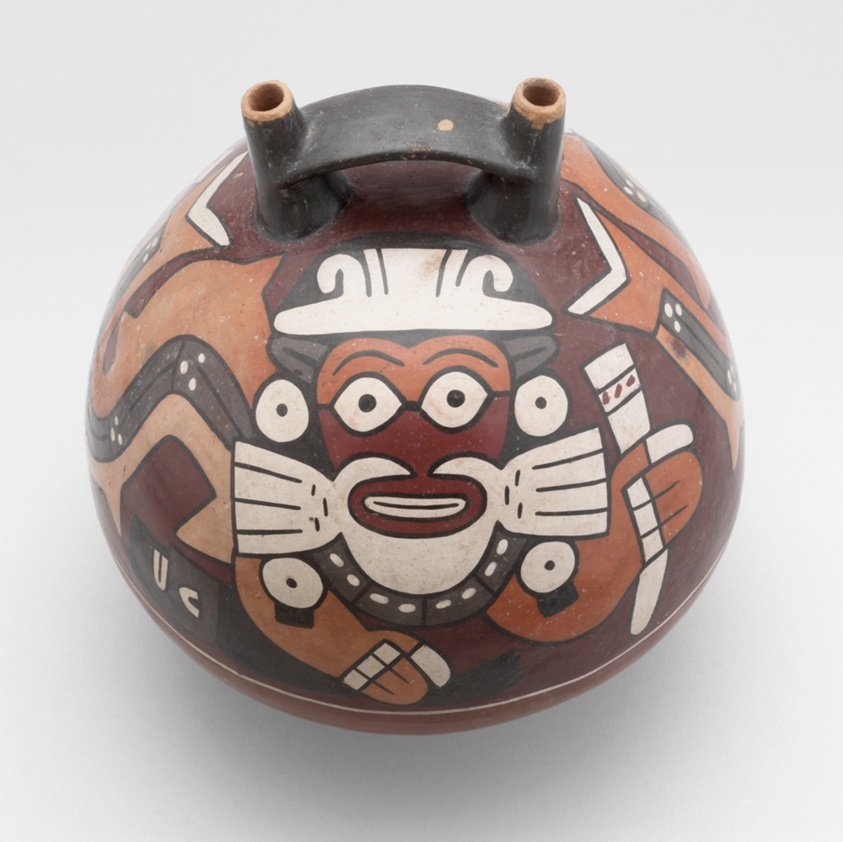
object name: Vessel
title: Vessel with Marine Beings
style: nazca, early intermediate period, Pre-Columbian, americas, andes, Arts of the Americas, andean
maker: Nazca; South coast, Peru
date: 50–500 CE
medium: Ceramic and pigment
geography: Peruvian South Coast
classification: earthenware; art of the americas; ceramics; vessel; masks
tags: people, animals, composite, fish, sacrifice, warriors, costumes, masks